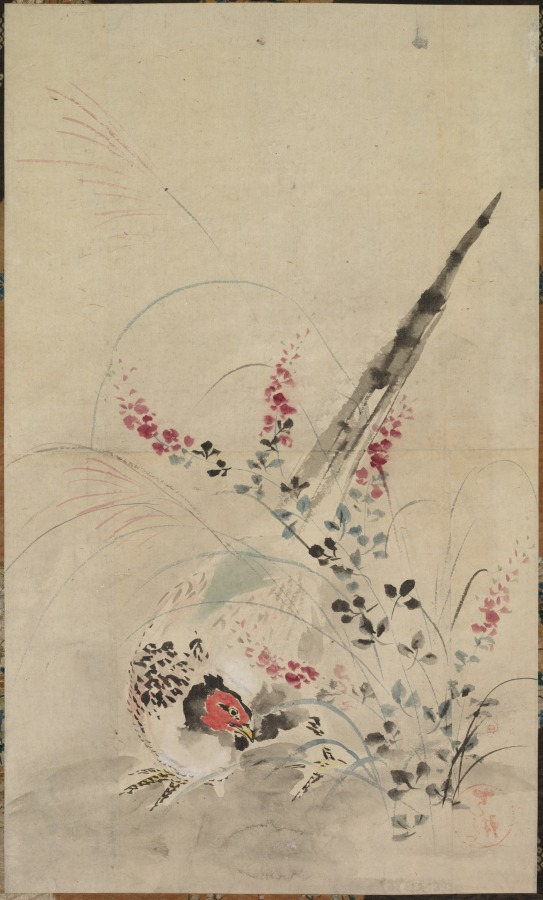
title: Pheasant and Grasses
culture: Japan, Edo period (1615–1868)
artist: attributed to Ogata Kōrin (Japanese, 1658–1716)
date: late 1600s–early 1700s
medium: hanging scroll; ink and color on paper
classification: Painting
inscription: two seals of artist, lower right.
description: Korin was a founder of the Rimpa (decorative) school of painting and was a keen observer of nature. The pheasant is often associated with autumn.